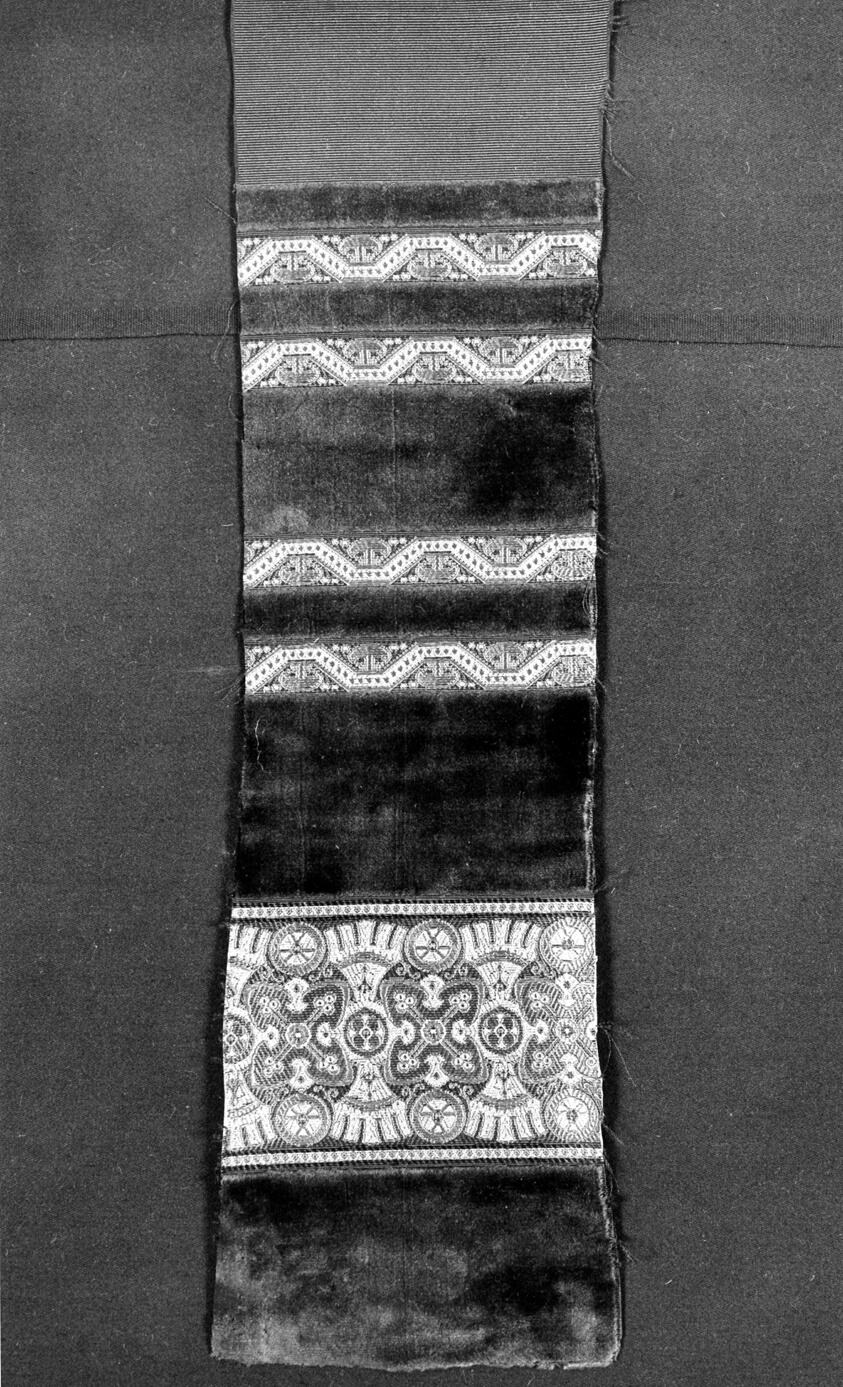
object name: Textile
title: Fragment of a Border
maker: France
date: c. 1865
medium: Silk, plain weave; with supplementary patterning warps forming cut pile (velvet); and self-patterning wefts which tie with supplemenatry binding warps in twill weave in pattern areas; alternating bands of velvet and patterned design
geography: France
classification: textile; weaving